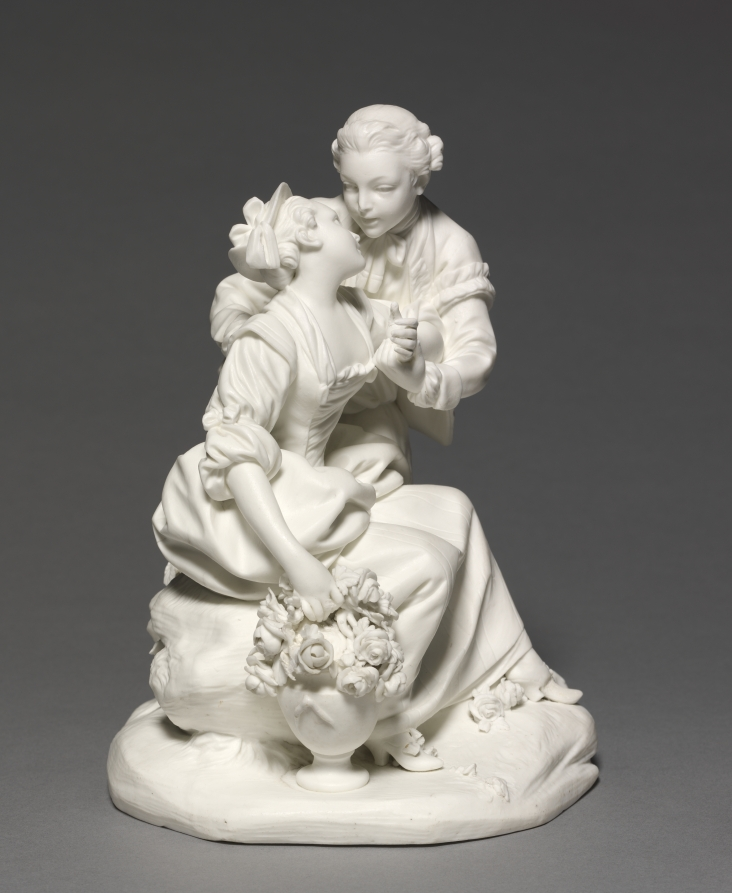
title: Figure Group of the Festival at the Chateau (La fête au château) or the Model Fidelity (La fidélité modèle)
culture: France, Sèvres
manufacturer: Sèvres Porcelain Factory (French, est. 1756)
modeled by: Etienne-Maurice Falconet (French, 1716–1791)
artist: after a design by François Boucher (French, 1703–1770)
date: 1766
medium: unglazed soft-paste porcelain (biscuit)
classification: Ceramic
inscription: 'B' incised on top of base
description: Recognizable porcelain figures and figure groups modeled after contemporary theatrical works produced by the Parisian company Opéra-Comique were produced at the Vincennes factory as early as 1752. This group illustrates a scene from a play credited to Charles-Siméon Favart, Fête au Château (Festival at the Castle), when the gardener Jacquot and his love Colette reunite.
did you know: The introduction of Sèvres porcelain figures modeled after the Opéra-Comique’s theatrical productions may have resulted from the friendship between François Boucher, designer of many early Sèvres porcelain figures, and Charles-Siméon Favart, director of the theater in 1758.